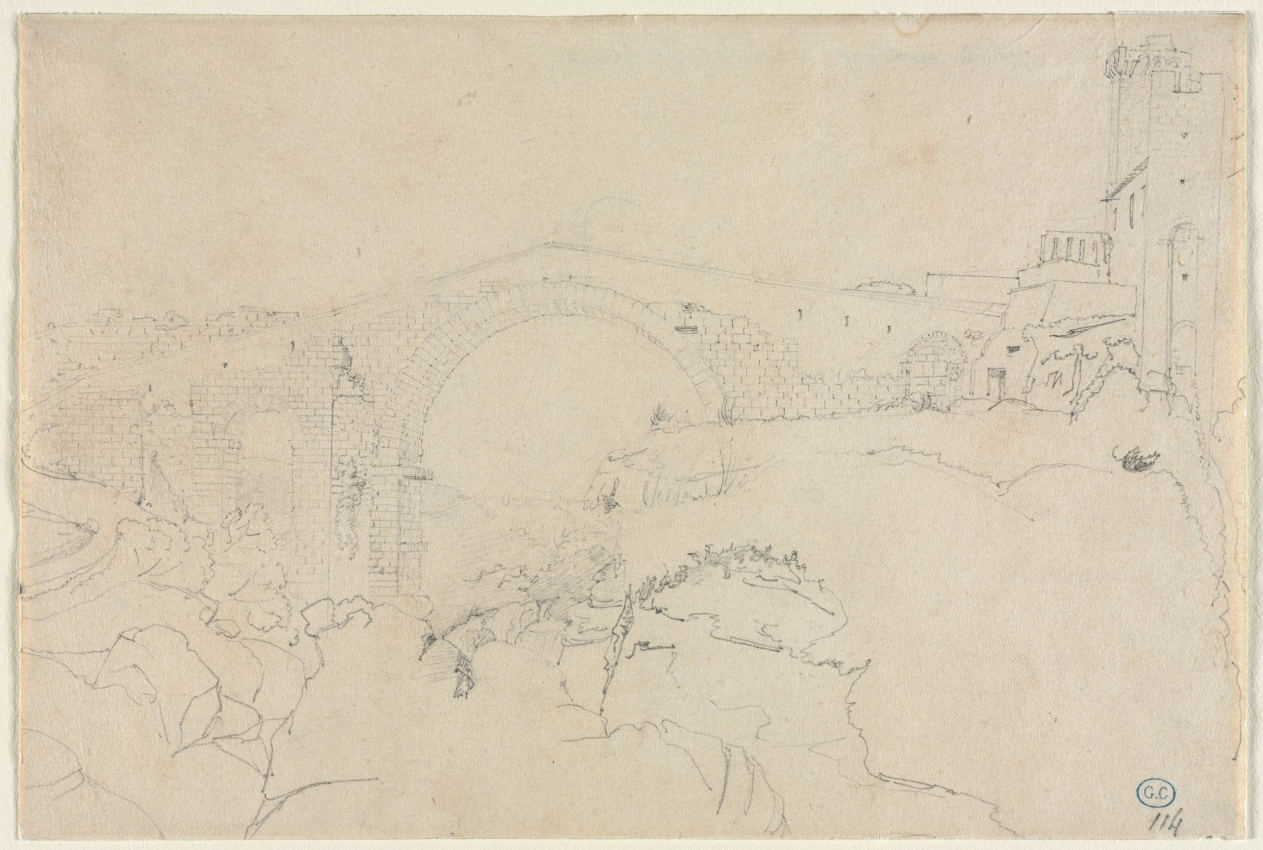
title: The Ponte dell'Abbadia at Vulci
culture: France, 19th century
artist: follower of Jean-Auguste-Dominique Ingres (French, 1780–1867)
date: first half 19th century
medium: graphite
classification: Drawing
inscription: lower right, in graphite: 114 ; VERSO, upper left, in graphite: [illegible, partially erased] ; upper left, in graphite: pont antique dans la Sabine ; lower right, in graphite: [illegible, partially erased] geri[ne?] ancien Ingr V[illegible]